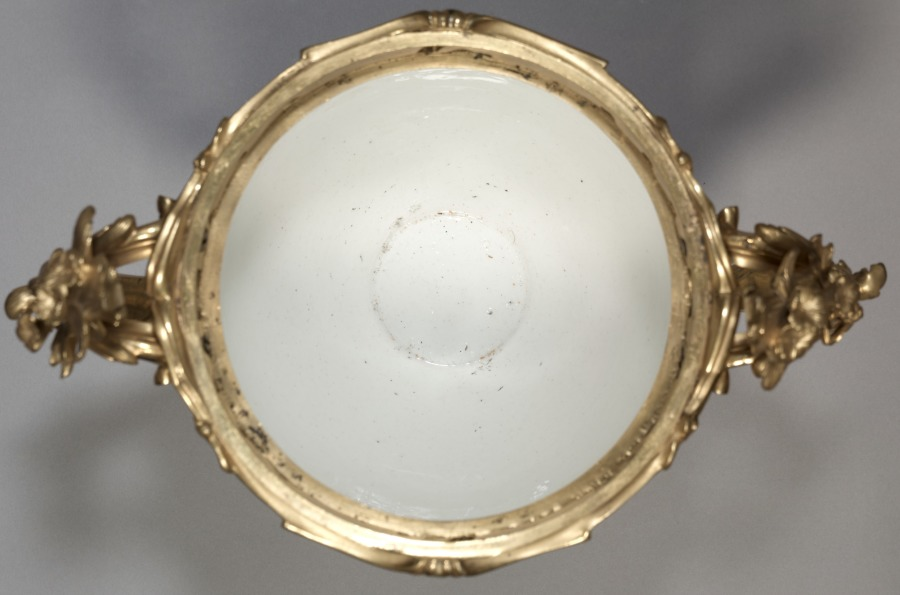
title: Vase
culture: Germany, Meissen, 18th century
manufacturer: Meissen Porcelain Factory (German, est. c. 1710)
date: 1749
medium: porcelain mounted in gilt bronze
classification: Ceramic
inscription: on obelisk located in one of the cartouche openings, the date 1749 appears.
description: One of these vases is dated 1749. They were perhaps part of a set of four covered vases that we know from documents were acquired by Mme. de Pompadour, mistress of Louis XV in 1752.